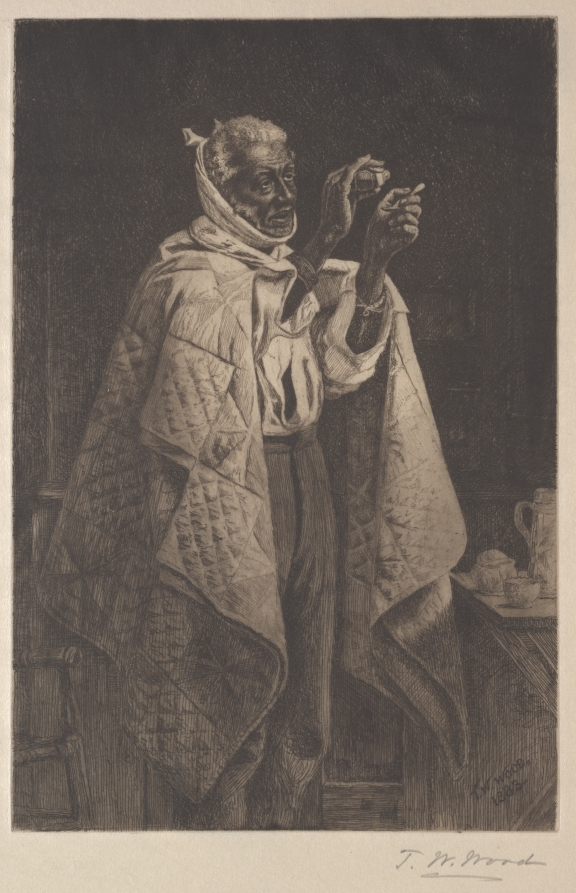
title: His Own Doctor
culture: America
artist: Thomas Waterman Wood (American, 1823–1903)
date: 1883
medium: etching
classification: Print